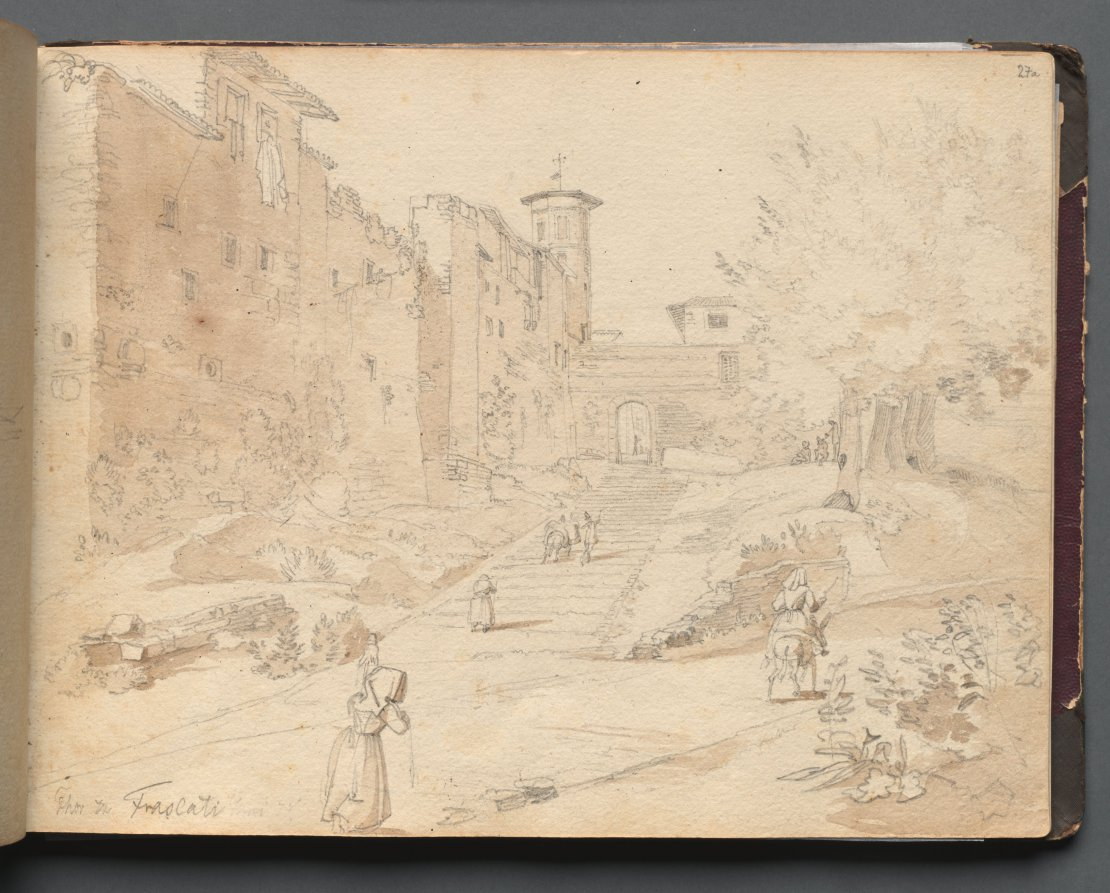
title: Album with Views of Rome and Surroundings, Landscape Studies, page 27a: "Frascati"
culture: Germany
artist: Franz Johann Heinrich Nadorp (German, 1794–1876)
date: c. 1830s-70s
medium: graphite with brown wash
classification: Bound Volume